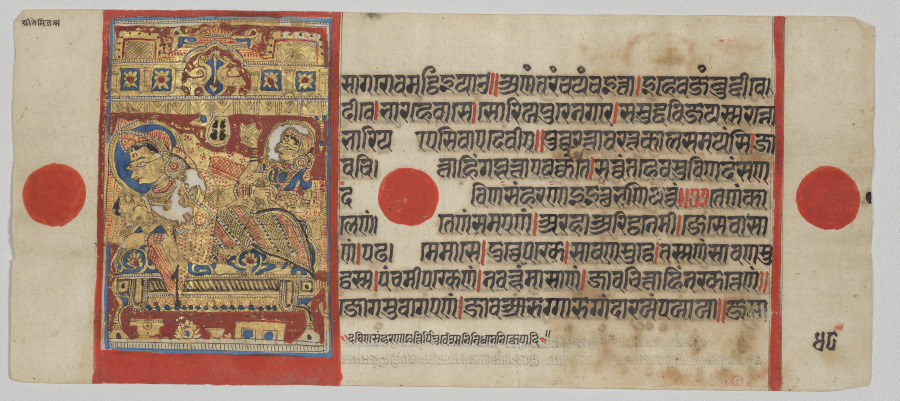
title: Birth of Nemi, Folio 48 (verso), from a Kalpa-sutra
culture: Western India, Gujarat, last quarter of the 15th century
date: c. 1475–1500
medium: Gum tempera, ink, and gold on paper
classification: Painting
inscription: [[upper left]] Śrī Nemi janma